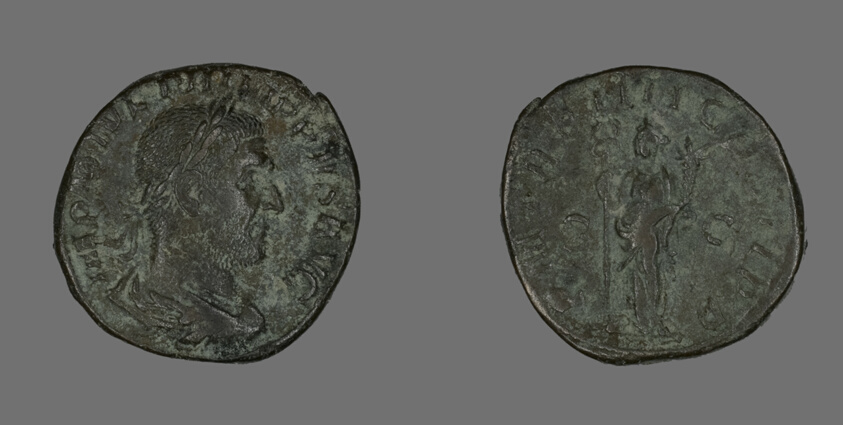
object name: Coin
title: Sestertius (Coin) Portraying Philip the Arab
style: roman (ancient, style or period), ancient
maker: Roman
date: 247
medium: Bronze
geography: Roman Empire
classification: coin; ancient art